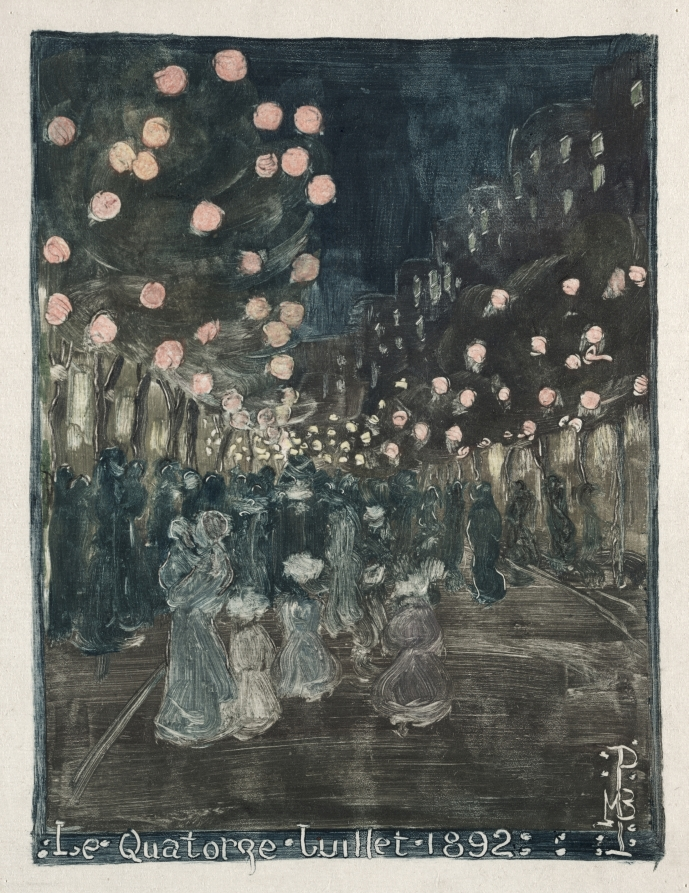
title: Bastille Day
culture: America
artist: Maurice Prendergast (American, born Newfoundland [now Canada], 1858–1924)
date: 1892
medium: color monotype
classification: Print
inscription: inscribed, at bottom in image: Le Quatorze Juillet 1892; initialed, at lower right in image: MBP [in monogram]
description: Maurice Prendergast began to make monotypes in the early 1890s while living in Paris, where he was influenced by Edgar Degas's use of the technique. Prendergast focused on scenes from daily life, such as this depiction of crowds filling the streets of the French capital on the country's national holiday. He used layers of blue and black ink to evoke the shadowy tones of nighttime and orbs of bright pink to suggest the artificial light of lanterns illuminating the boulevards.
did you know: This print is one of the few works that can be dated to Maurice Prendergast's early years in Paris.